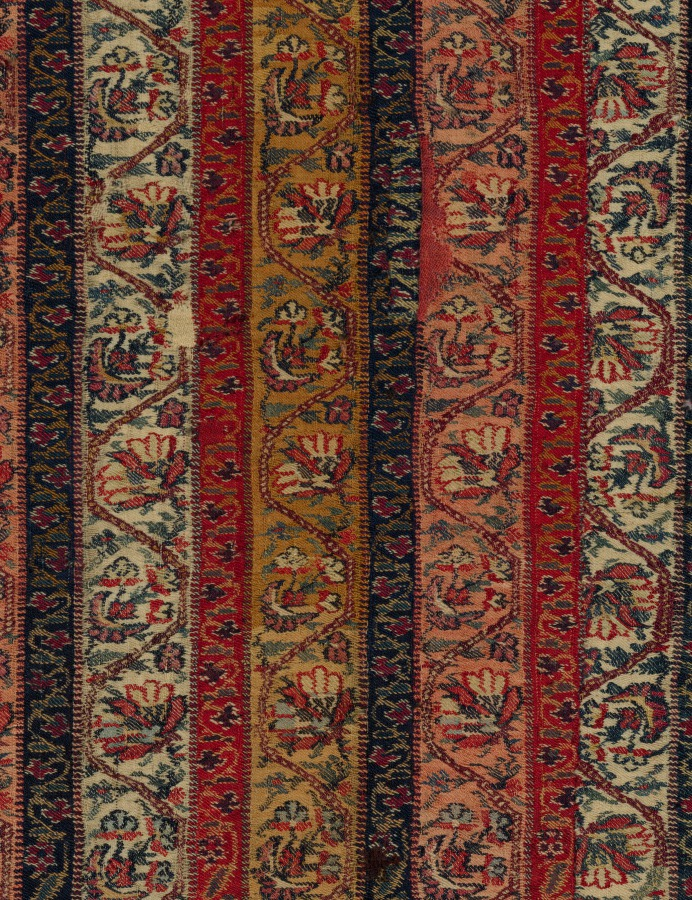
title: Fragment: Back of a Coat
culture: India, Kashmir, 19th century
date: after 1830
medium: twill weave, brocaded; wool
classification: Textile